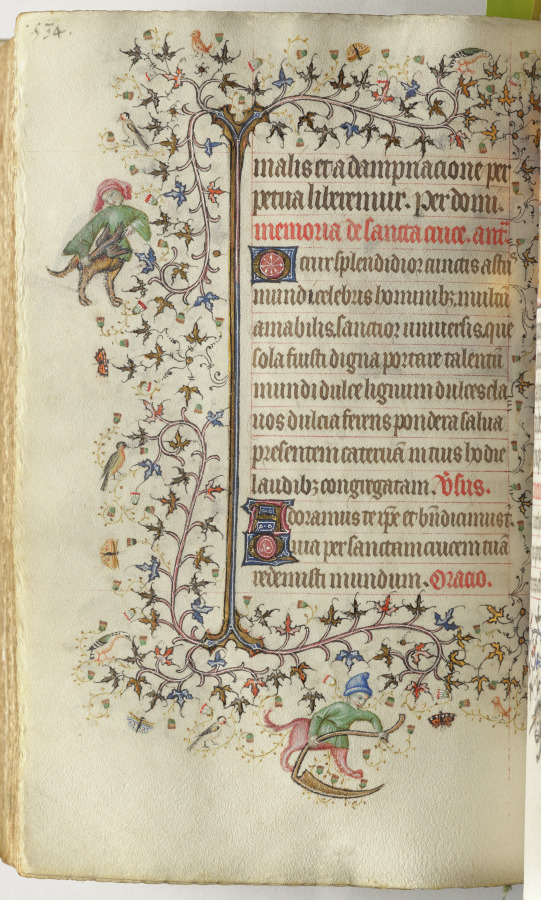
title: Hours of Charles the Noble, King of Navarre (1361-1425): fol. 261v, Text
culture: France, Paris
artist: Master of the Brussels Initials and Associates (French)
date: c. 1405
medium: ink, tempera, and gold on vellum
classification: Bound Volume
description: This precious volume was obviously highly prized by its owner, the French-born King of Navarre, who had his coat of arms painted on no less than twenty folios. Rather than directly commissioning this manuscript from a specific workshop, it seems that Charles the Noble acquired his book of hours -- perhaps ready-made for the luxury market -- while on a trip to Paris in 1404-05. A collaborative effort, six painting styles are evidenced within the pages of this codex, those of two Italians, two Frenchmen, and two Netherlanders. The painter who was responsible for the planning and decoration of the book, and who produced seventeen of the large miniatures, was a Bolognese artist known as the Master of the Brussels Initials. His principal assistant, responsible for most of the borders, was a Florentine who signed his name "Zecho" da Firenze on folio 208 verso.